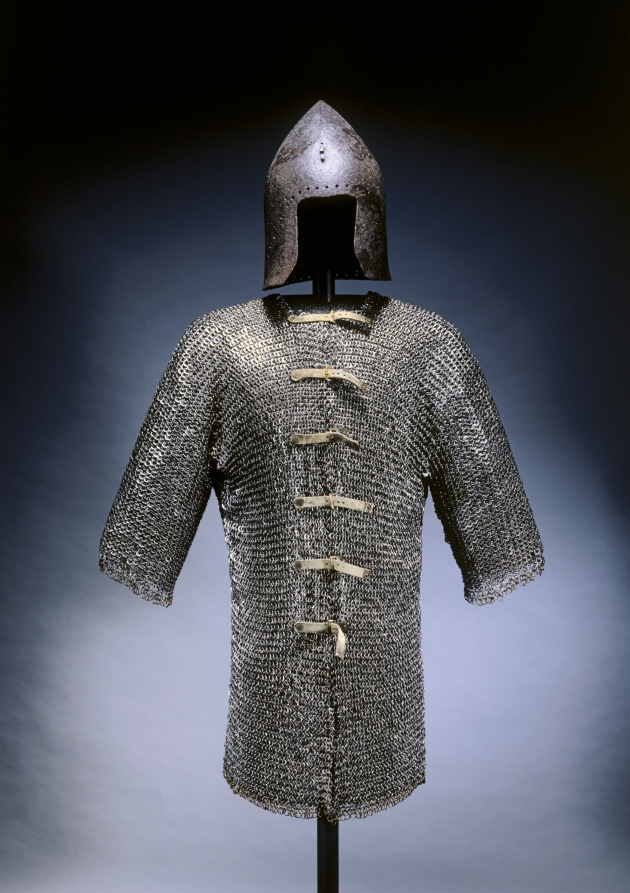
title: Barbute (from the Venetian Garrison at Chalcis)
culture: North Italy, 14th-15th century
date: c. 1350–1420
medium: iron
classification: Arms and Armor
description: This is a rare example of a type of helmet used from about 1350 to 1480. Its conical shape deflected glancing blows to the head. Italian chronicles refer to professional men-at-arms as barbuti. The word derives from the Italian barba, or beard, a reference to the hood of mail often attached to these early helmets. The row of small holes along the face opening and neck were for the attachment of the hood and lining.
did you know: This helmet and a number of others were apparently excavated from the Venetian garrison at Chalcis on the Greek island of Euboea.